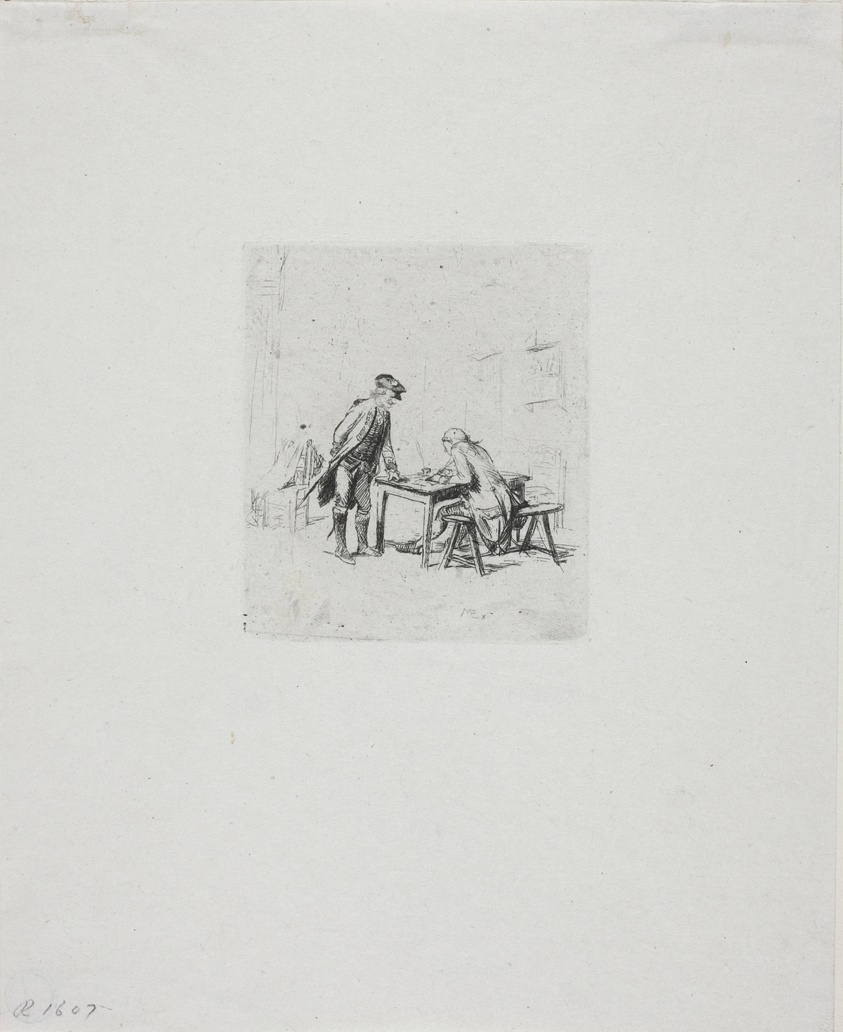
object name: Print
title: The Sergeant Reporter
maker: Jean Louis Ernest Meissonier (French, 1815-1891)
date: 1862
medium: Etching and drypoint on ivory laid chine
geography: France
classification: etching; print; prints and drawing